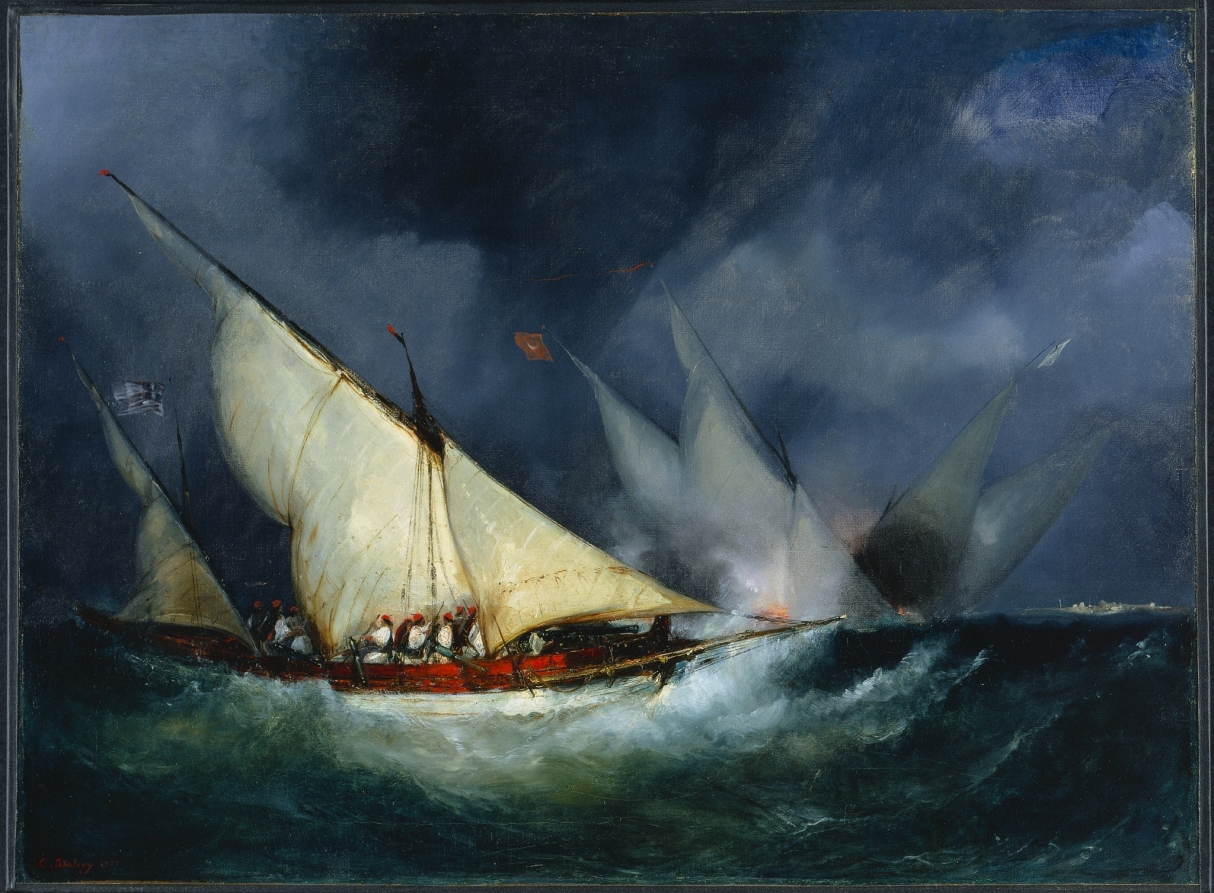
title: Greek Pirates Attacking a Turkish Vessel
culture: France, 19th century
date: not dated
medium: oil on fabric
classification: Painting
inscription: Signed lower left: E Isabey. 1827